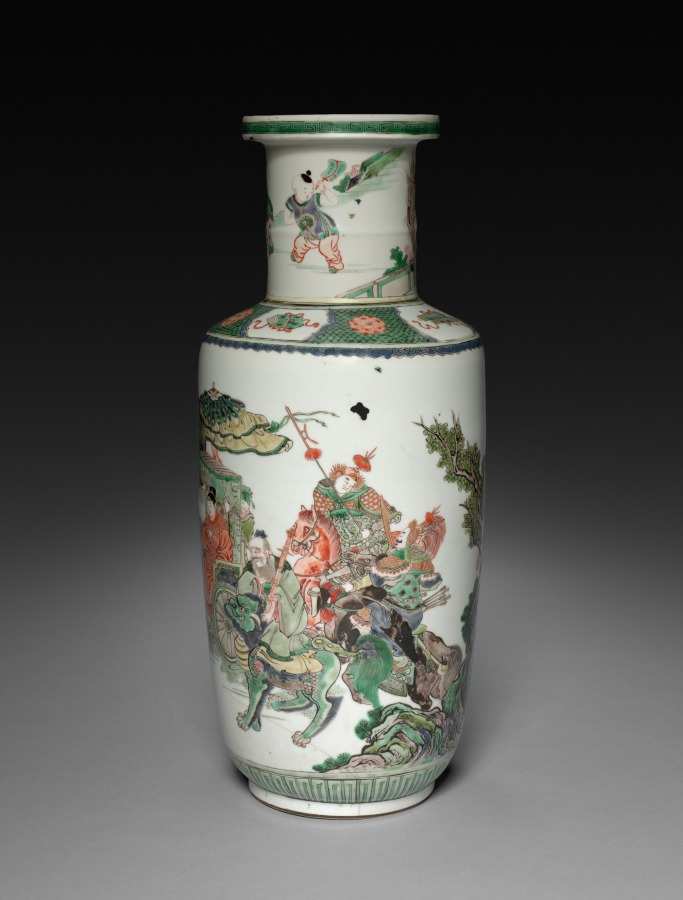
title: Vase with Decoration of Figures in Chariots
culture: China, Qing dynasty (1644-1911), Kangxi reign (1662-1722)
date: 1622–1722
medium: porcelain with famille verte overglaze enamel decoration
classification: Ceramic